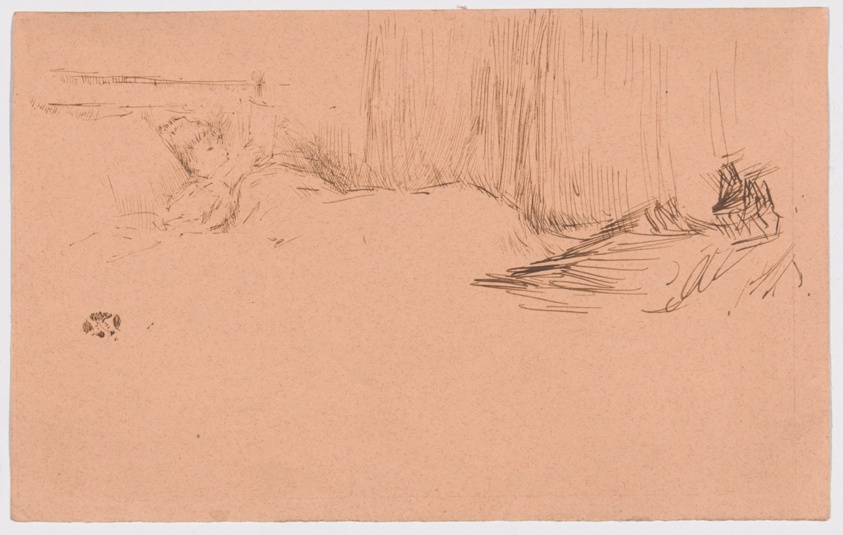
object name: Drawing and Watercolor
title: Girl Reading in Bed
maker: James McNeill Whistler (American, 1834-1903)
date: c. 1882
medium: Pen and brown ink with traces of graphite on pink wove paper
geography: United States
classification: pen and ink drawings; drawings (visual works); prints and drawing; paper